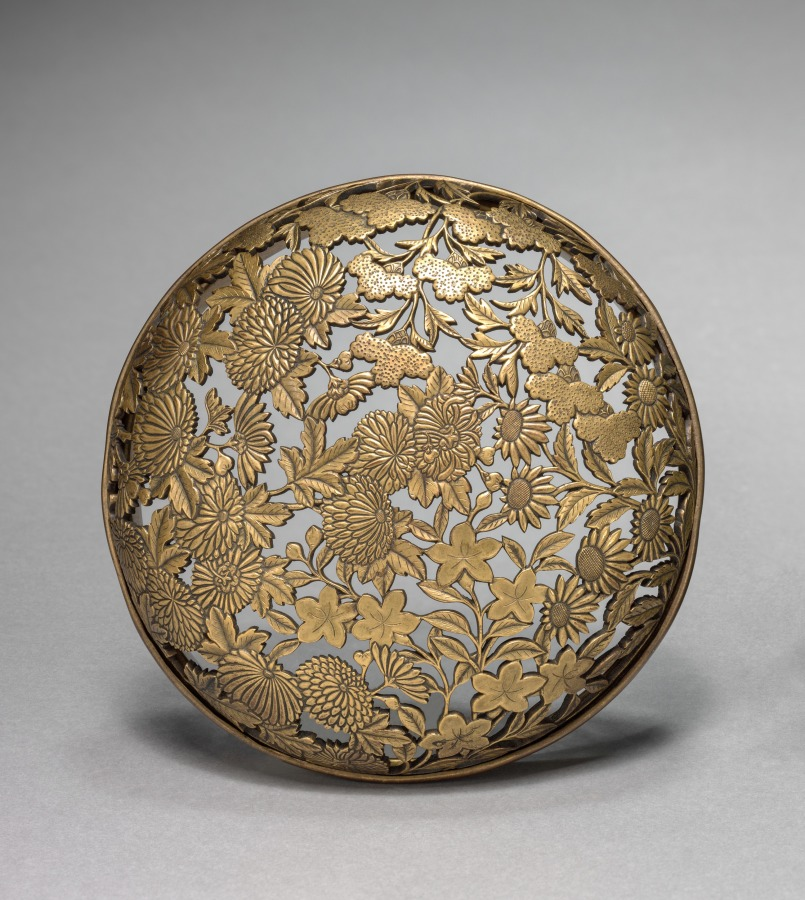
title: Incense Burner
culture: Japan, Meiji period (1868–1912)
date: late 1800s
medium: Porcelain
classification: Ceramic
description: This incense burner emulates Chinese porcelain in its glaze and form. A number of prominent Meiji-period ceramicists explored classical Chinese forms and glazes even as they also produced stoneware with Japanese-style glazes.